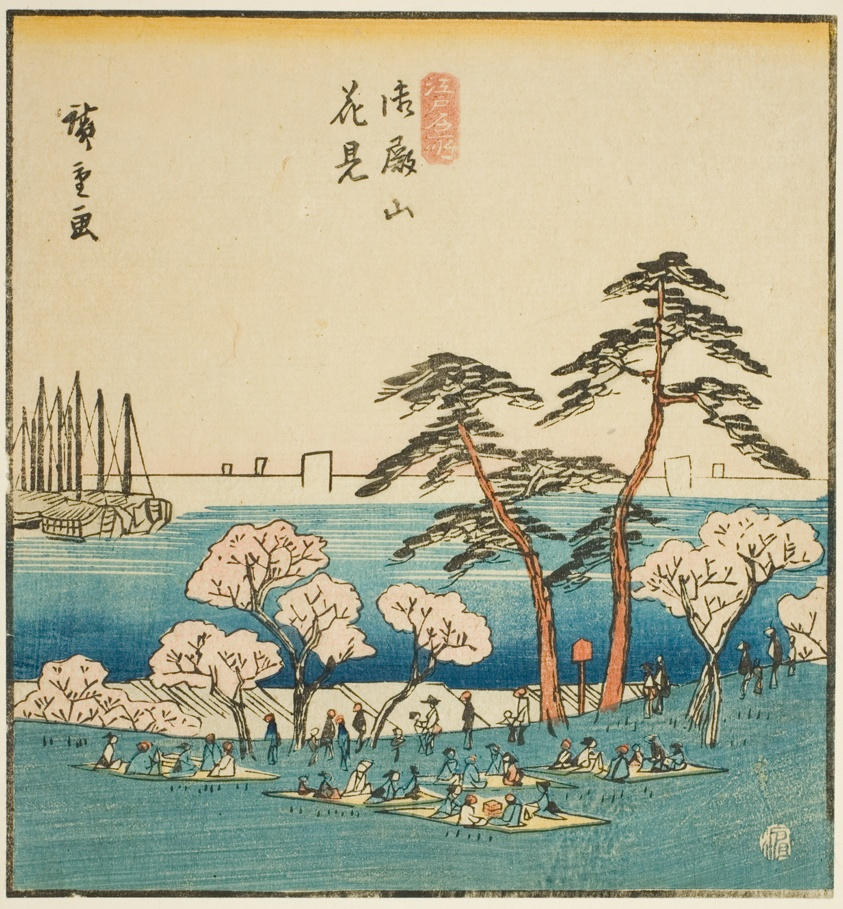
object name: Print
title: Cherry-blossom Viewing at Goten Hill (Gotenyama hanami), section of a sheet from the series "Famous Places in the Eastern Capital (Toto meisho)"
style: Japanese (culture or style)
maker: Utagawa Hiroshige 歌川 広重; Japanese, 1797-1858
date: 1840s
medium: Color woodblock print; section of harimaze sheet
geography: Japan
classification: woodblock print; print; asian art